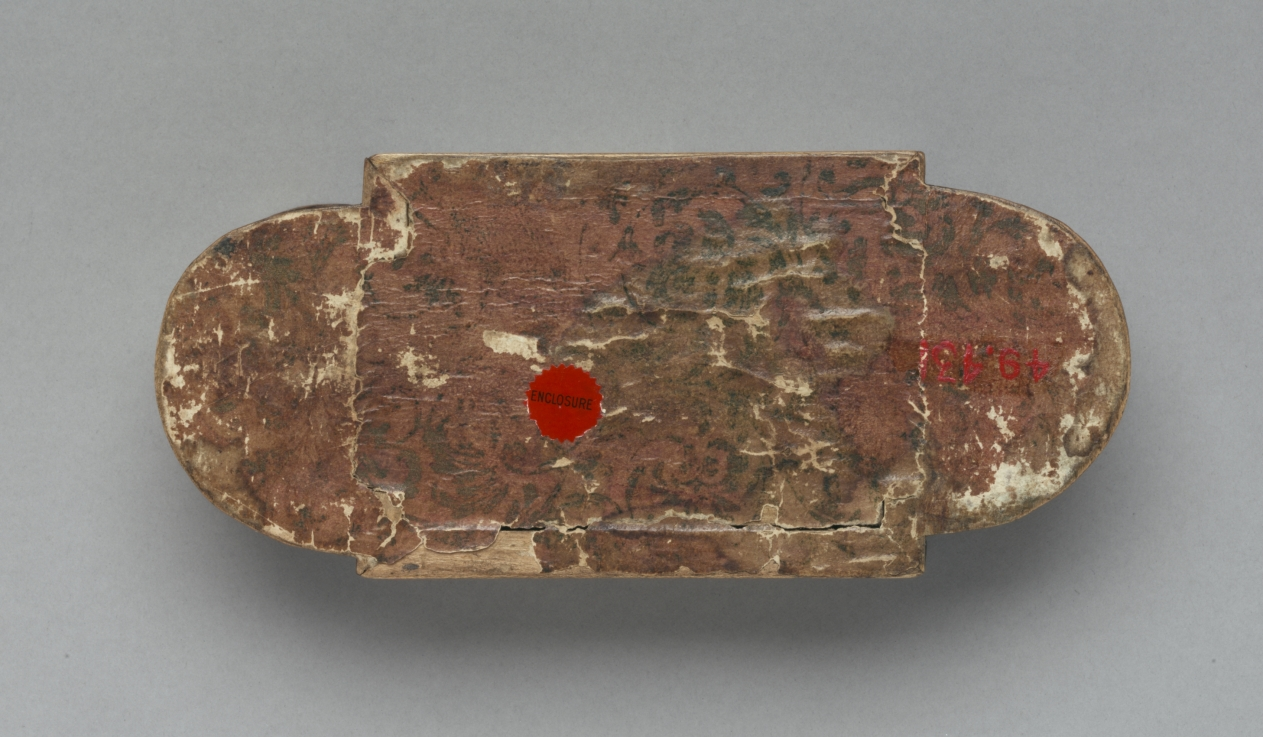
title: Pyx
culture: Germany, Lower Saxony, Hildesheim?, Romanesque period, enamels: 12th century; wood core: 19th century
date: c. 1170–1180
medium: gilded copper, champlevé and cloisonné enamel, wood core (modern)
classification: Enamel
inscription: + H[A]EC DATA P[ER] IVSTV[M] […]AT IN CRVCE VICTIMA CHR[ISTV]M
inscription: + HOC ARIES P(RE)FERT Q[VO]D […] D[EV]S HOSTIA P[ER]FERT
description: The image of Christ’s crucifixion dominates this enameled box. Personifications of the Christian church, the Jewish faith, and the Virgin and Saint John flank the cross. Two Old Testament scenes--Abel’s sacrifice of sheep and Abraham’s sacrifice of Isaac--appear on either side. The box once served as a pyx, a container for the consecrated host, itself a symbol of Christ’s sacrifice.